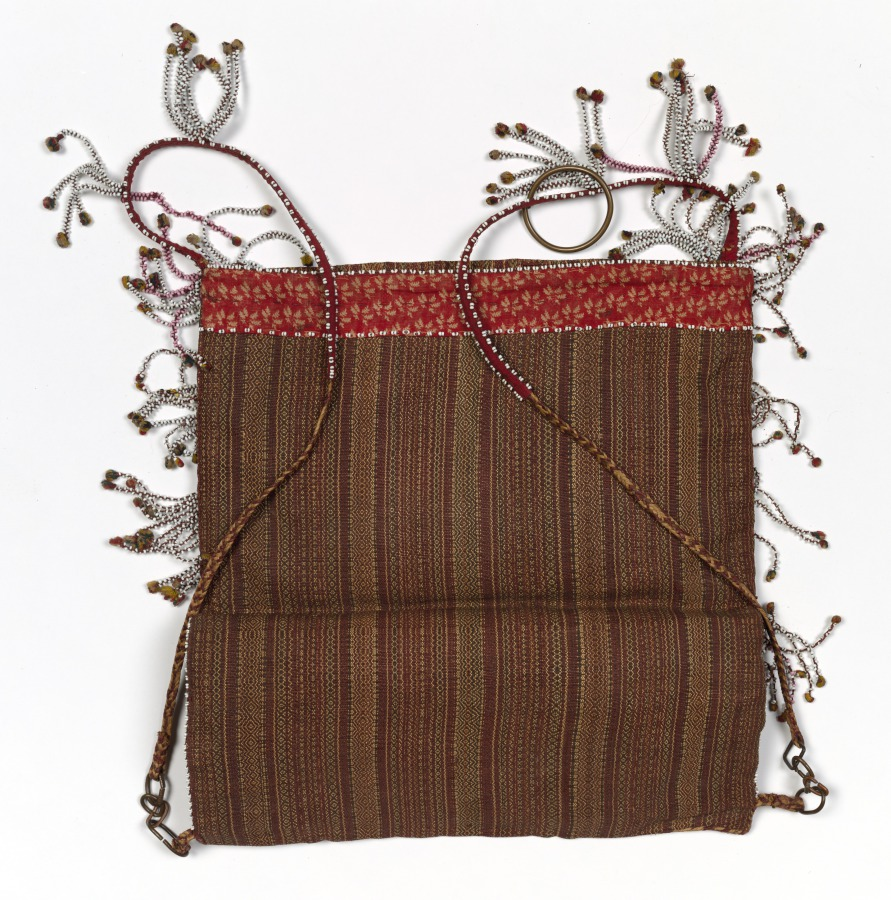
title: Backpack (Bagobo people)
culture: Philippines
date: early 1900s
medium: Handwoven abacá cloth, printed cotton cloth, abacá fiber (braided/plaited cordage), glass beads, metal sequins, metal rings, fiber tassels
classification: Textile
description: This backpack for men is constructed from a single length of handwoven abacá cloth, woven in a warp-faced plain weave with supplementary weft patterning. The beadwork uses glass beads of various colors arranged in geometric bands and diamond motifs characteristic of the Bagobo people. Two shoulder straps, constructed from braided abacá fibers overlaid with cotton cloth and embellished with beads and metal sequins, are attached through metal rings.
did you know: Ethnographic photographs document backpacks like this one being worn by Bagobo men in ceremonial or formal contexts.